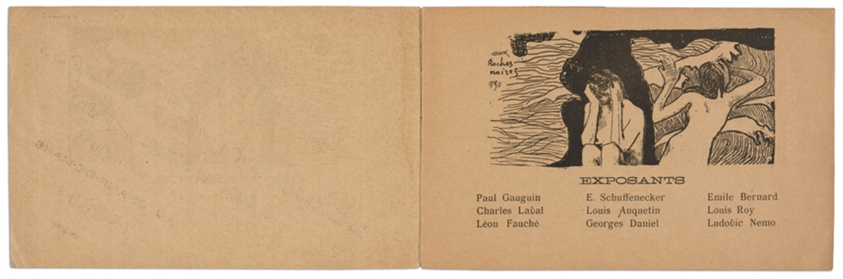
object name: Book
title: Catalogue de l'Exposition de Peintures du Groupe Impressionniste et Synthétiste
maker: Paul Gauguin (French, 1848-1903); Claude Emile Schuffenecker (French, 1851-1934); Émile Bernard (French, 1868-1941); Louis Roy (French, 1862-1907); Léon Fauché (French, 1868-1950); George Daniel de Monfreid (French, 1856-1929); Lodovic Némo (French)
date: 1889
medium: Book containing eight zincographs and letterpress text in black ink, with photomechanically printed gray stripes on cover, on tan wove paper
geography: France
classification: book; paper; prints and drawing